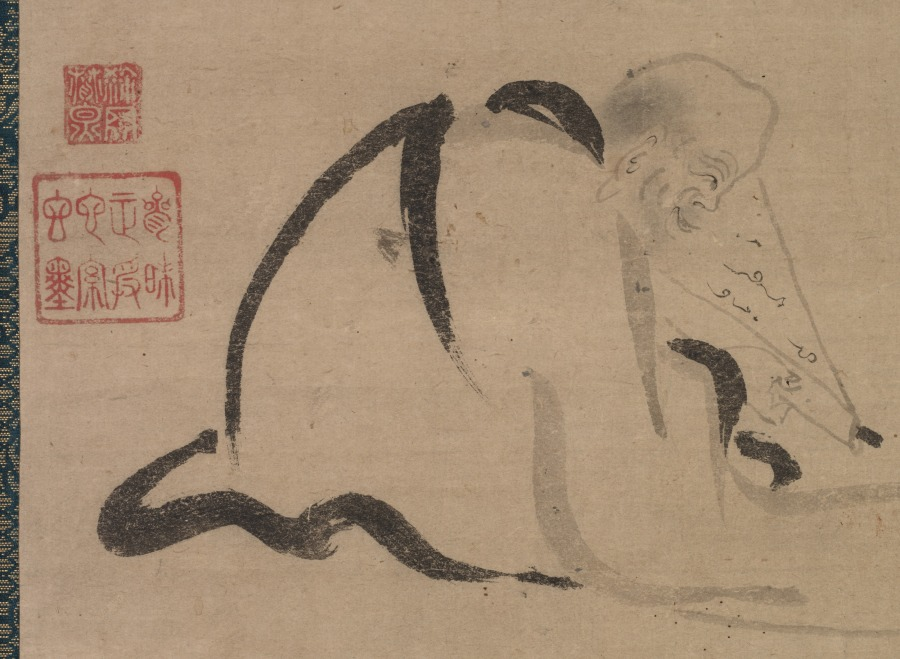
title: Seated Priest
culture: Japan, Momoyama period (1573-1615) to Edo period (1615-1858)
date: late 1500s-1650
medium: hanging scroll; ink on paper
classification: Painting